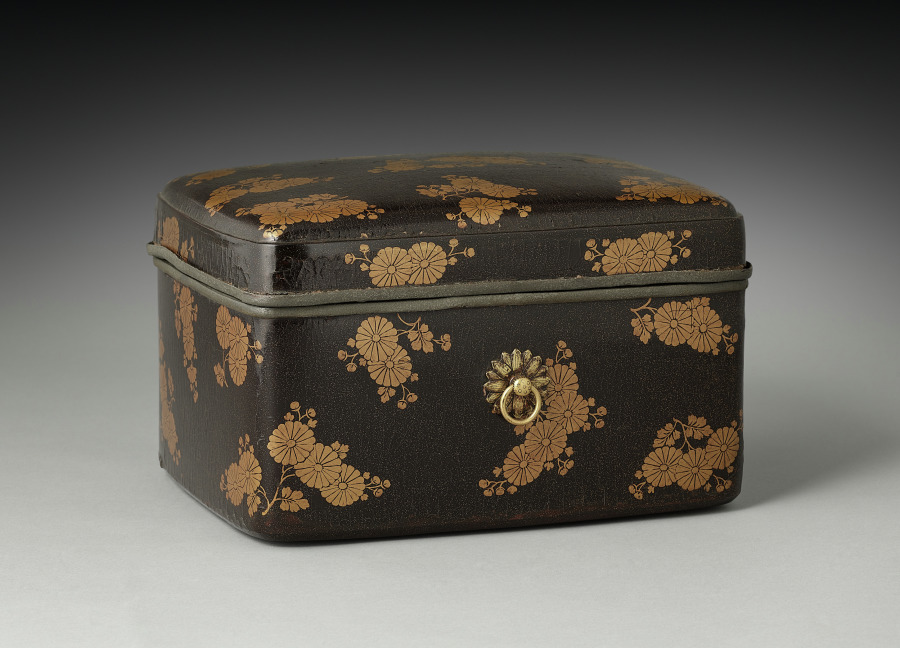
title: Cosmetics Box with Chrysanthemums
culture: Japan, Kamakura period (1185–1333)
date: early 1300s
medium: lacquer on wood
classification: Lacquer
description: In China, the chrysanthemum was historically appreciated for its association with the Double Nine Festival and the reclusive life of the poet Tao Yuanming (AD 365-427). In Japan, the 16-petaled chrysanthemum came to symbolize the Japanese imperial family after Emperor Gotoba (1180-1239) chose the motif as his personal emblem, having it applied to his sword and everyday utensils. This box proves that the flower also appeared on lacquer wares as early as the Kamakura period.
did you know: In Japanese, this type of small box is called a tebako, literally a hand box, and was typically part of a cosmetics set.